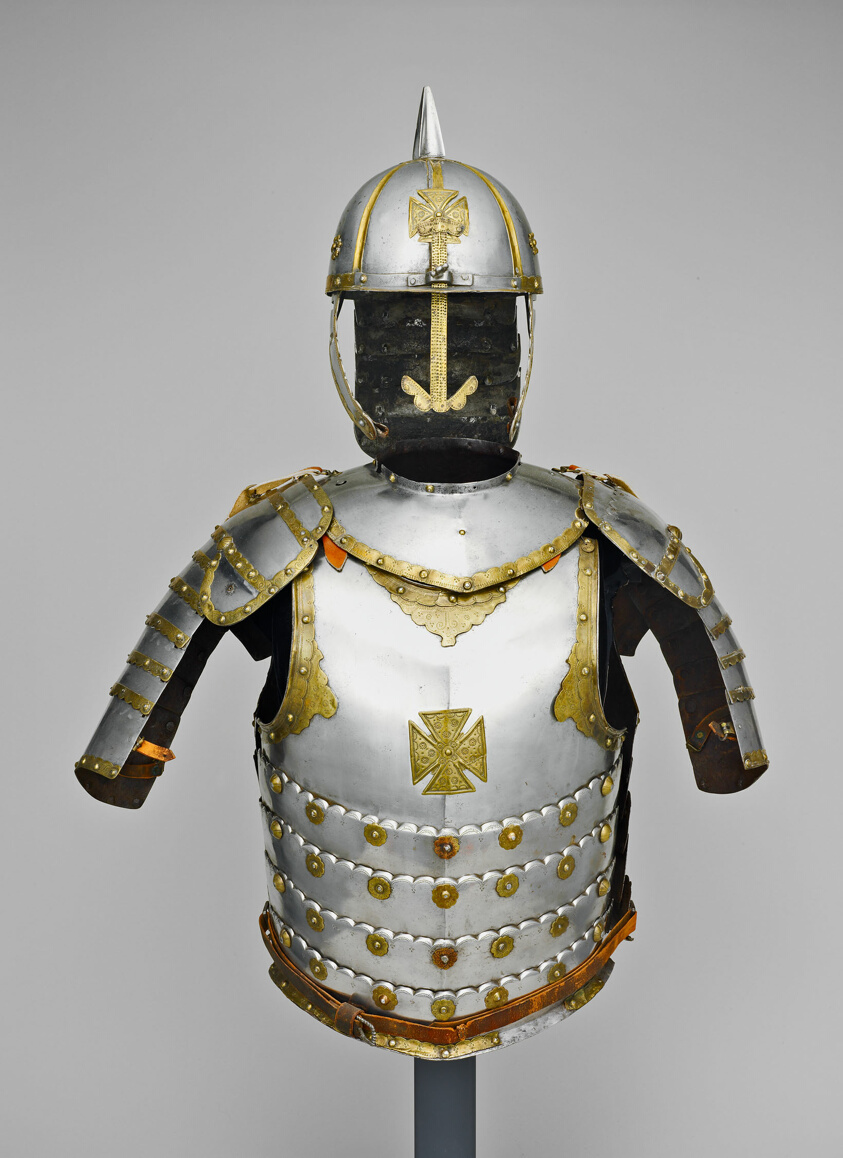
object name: Armor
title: Hussar's Armor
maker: Polish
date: 1675/1700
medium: Steel, brass, and leather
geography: Poland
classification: suit; armor; arms and armor